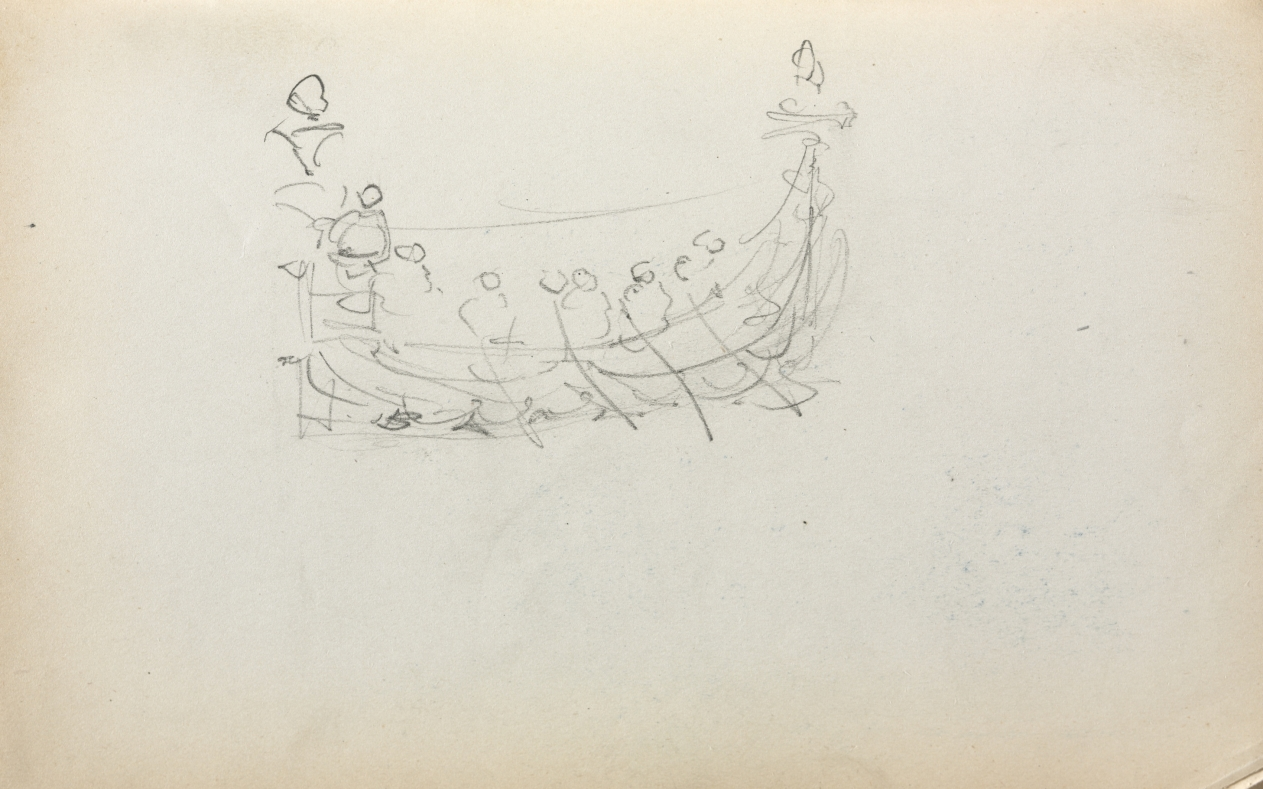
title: Italian Sketchbook: Venetian Boat (page 29)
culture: America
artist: Maurice Prendergast (American, born Newfoundland [now Canada], 1858–1924)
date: 1898–1899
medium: pencil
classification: Bound Volume